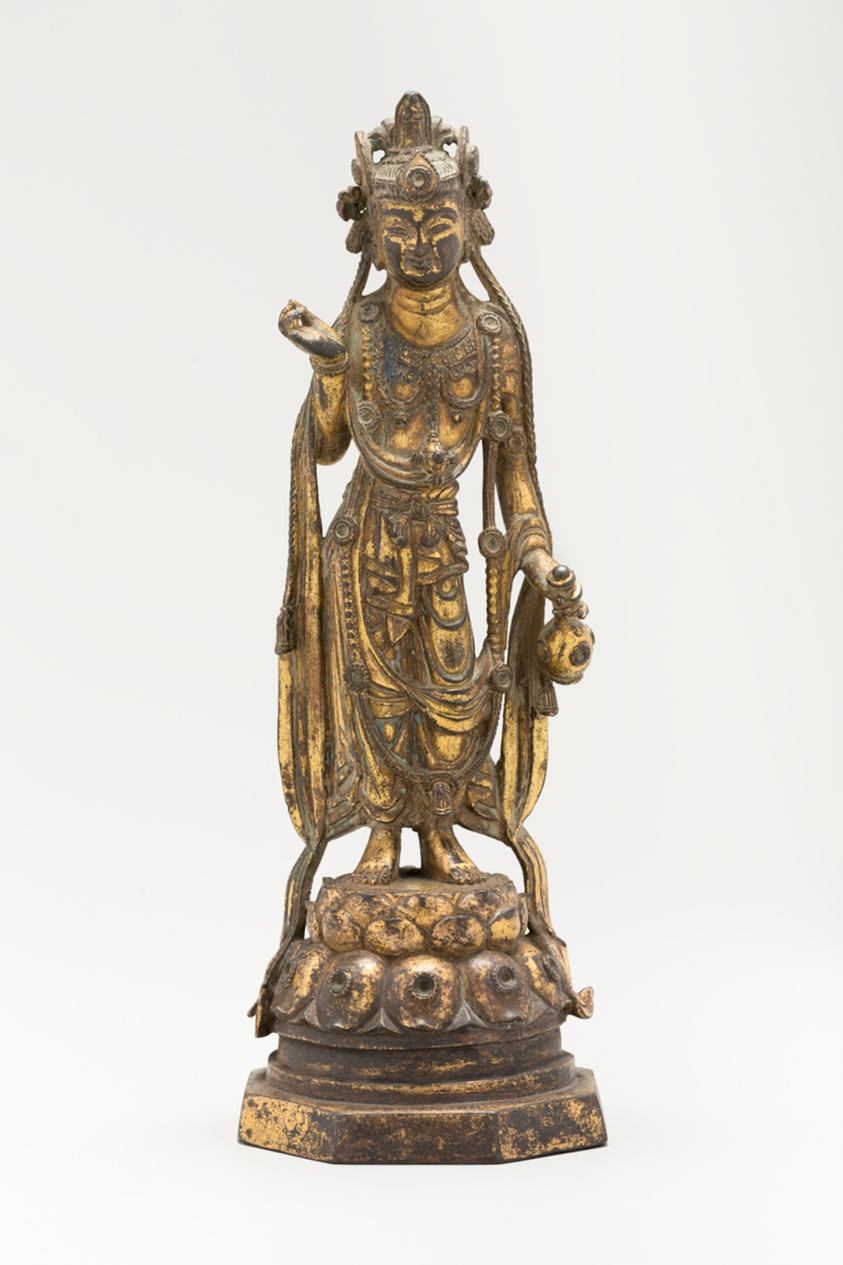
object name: Sculpture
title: White-Robed Guanyin (Avalokiteshvara) in "Thrice-Bent" Pose (Tribhanga), Holding a Vase with Nectar of Immortality (Amrta)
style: Chinese (culture or style)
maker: China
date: Sui dynasty (589–618), early 7th century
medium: Gilt copper alloy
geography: China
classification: vase; bronze; vessel; metal; sculpture; asian art